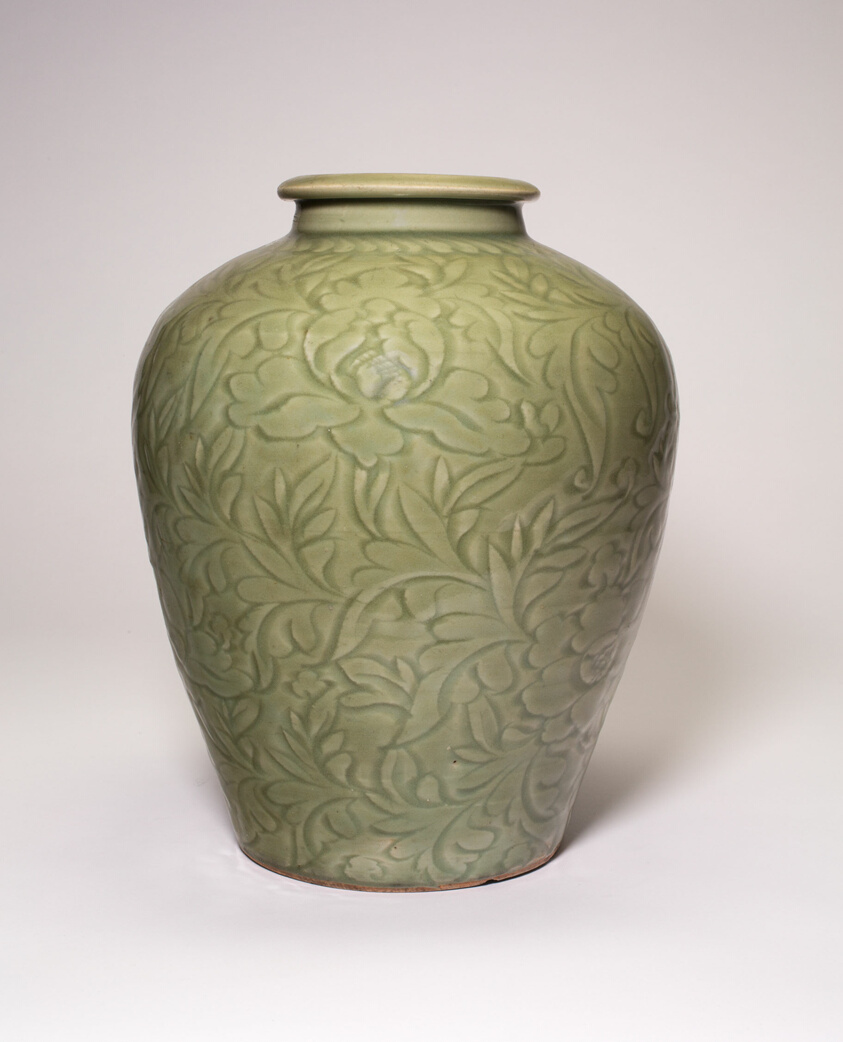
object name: Vessel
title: Jar with Peony Scrolls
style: Chinese (culture or style)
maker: China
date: Ming dynasty (1368–1644), 15th century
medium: Longquan ware; stoneware with underglaze carved decoration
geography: Junyao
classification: stoneware; ceramics; asian art; vessel